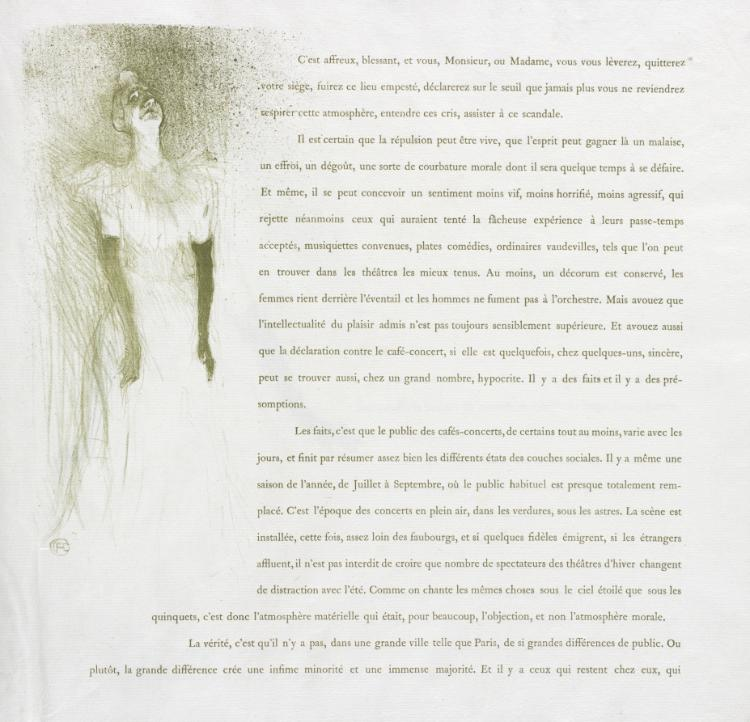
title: Yvette Guilbert-French Series: No. 3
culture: France, 19th century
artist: Henri de Toulouse-Lautrec (French, 1864–1901)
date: 1894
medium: lithograph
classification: Bound Volume